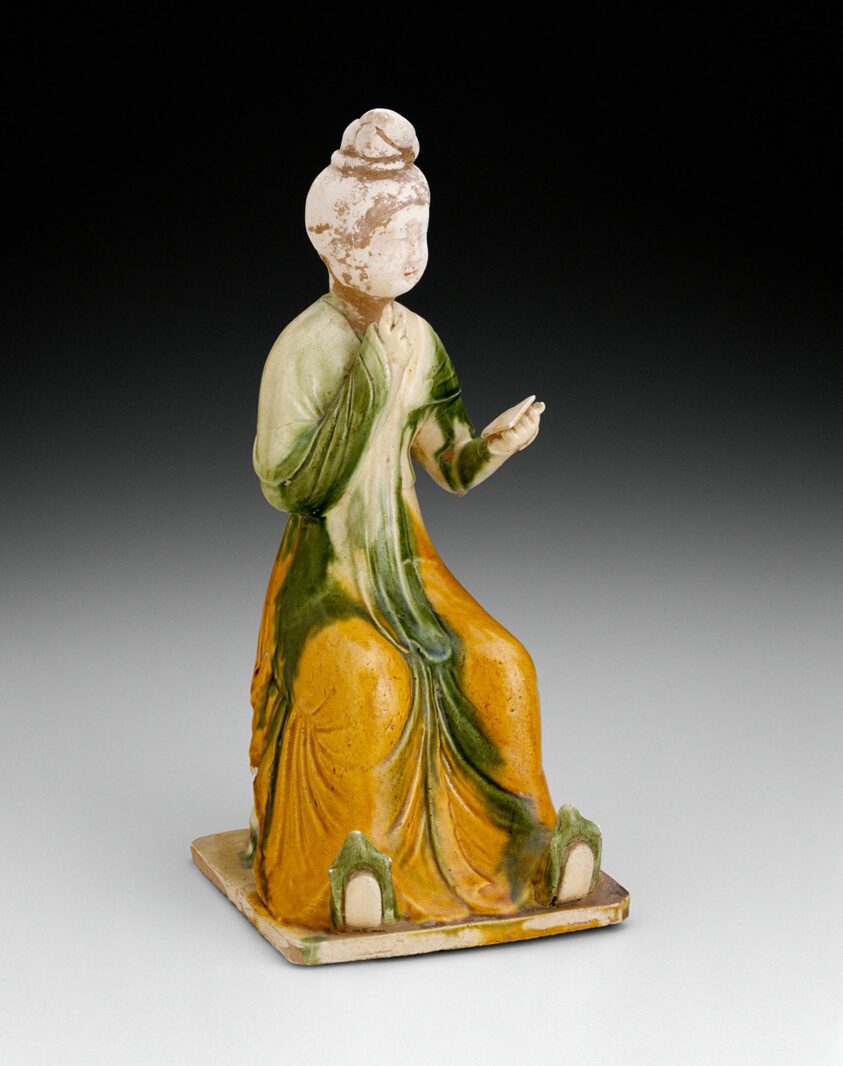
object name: Decorative Arts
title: Seated Woman Holding Mirror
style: Chinese (culture or style)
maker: China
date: Tang dynasty (A.D. 618–907), first half of 8th century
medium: Earthenware with three-color (sancai) lead glazes and traces of polychrome pigments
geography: China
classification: earthenware; asian art; ceramics; decorative arts